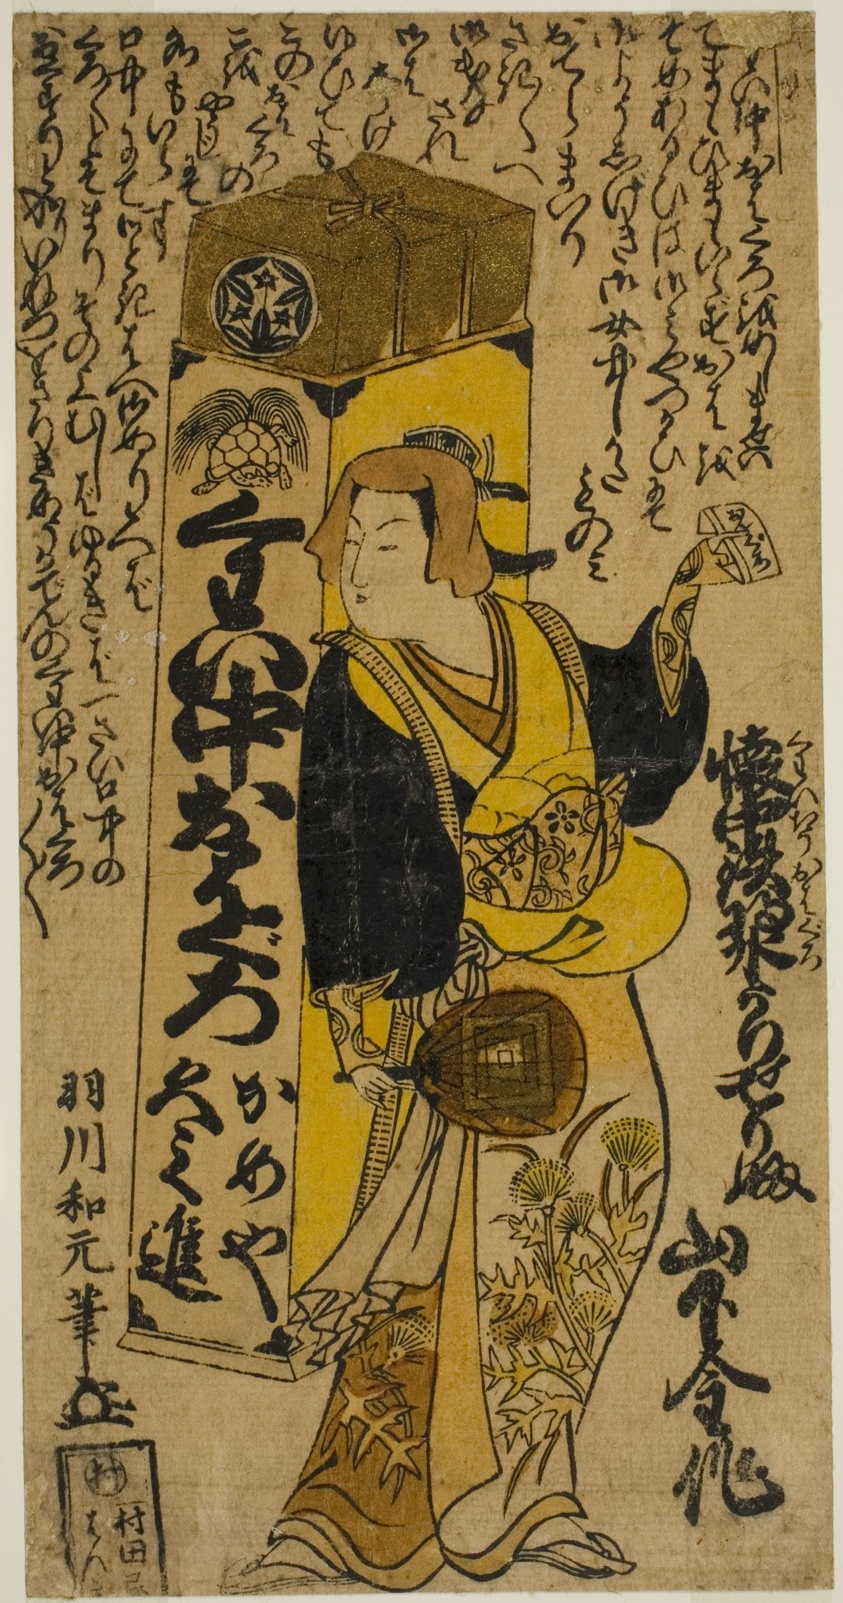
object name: Print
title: The Actor Yamashita Kinsaku I as a peddler of tooth-blackening dye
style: Japanese (culture or style)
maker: Hanekawa Wagen (Japanese, active c. 1716-36)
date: c. 1727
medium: Hand-colored woodblock print; hosoban, urushi-e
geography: Japan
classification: woodblock print; print; asian art